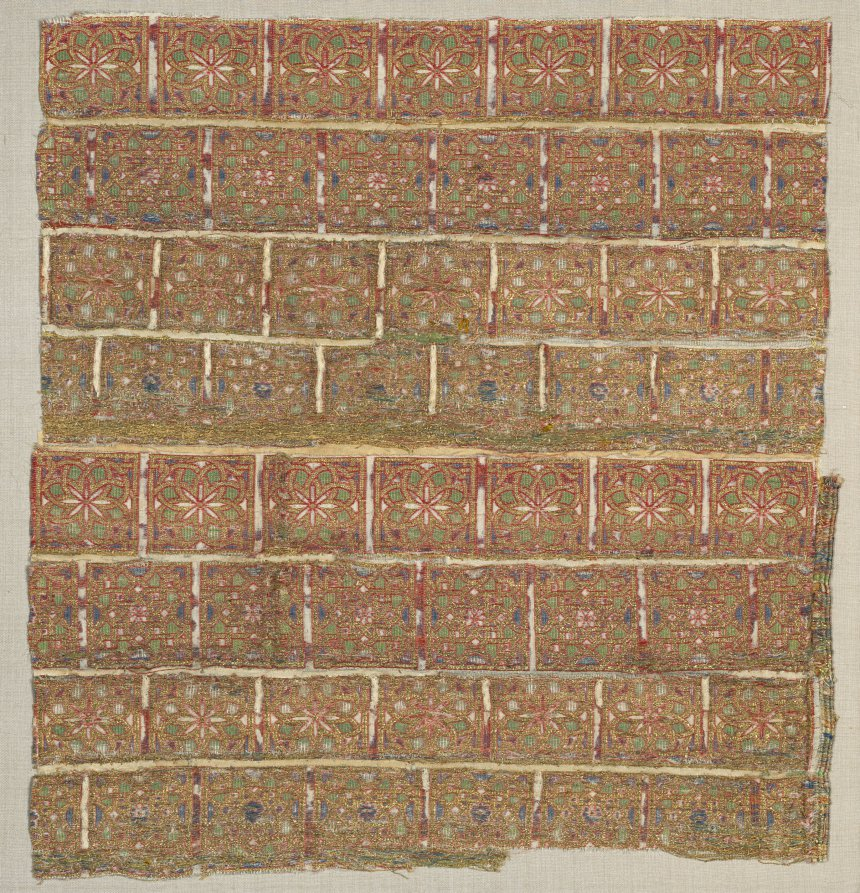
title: Vestment fragment with stars in staggered squares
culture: Spain, probably Almeria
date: 1200s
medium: Silk and gold thread: lampas weave with areas of double cloth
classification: Textile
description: Alternating rows of two different forms of interlacing stars set within square frames convey a jewel-like brilliance with gold and contrasting colors. This fragment was reused in an ecclesiastical vestment that made its way to the cathedral at Lleida in Catalonia, in northeastern Spain. A document dated 1275 records that the Bishop of Lleida and his companions brought “[A] complete set of vestments, of Muslim manufacture, which ornaments they dedicated to San Valero.”